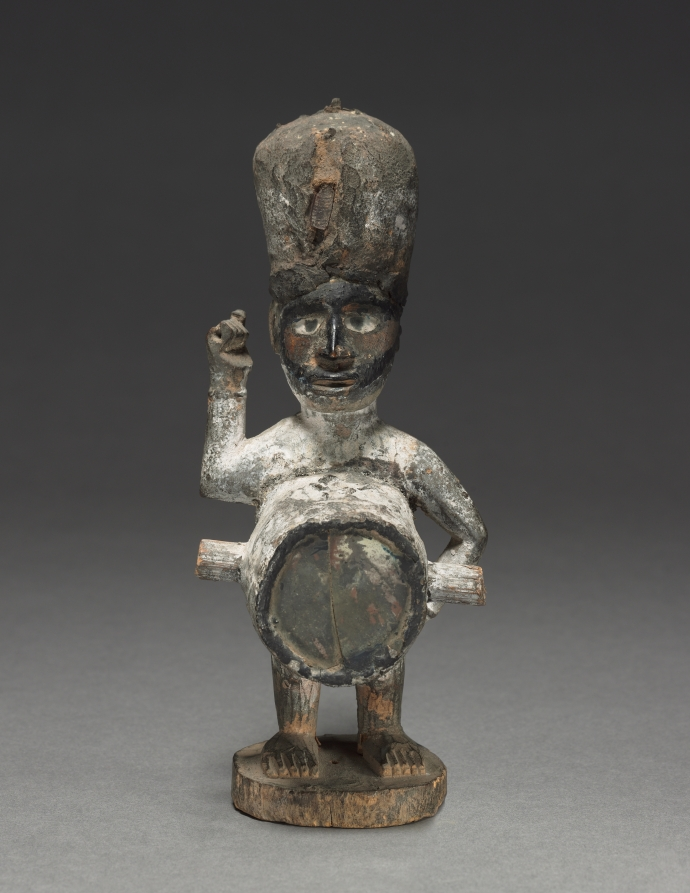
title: Power figure (nkisi)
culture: Central Africa, Republic of the Congo, Kongo people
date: late 1800s-early 1900s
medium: Wood, organic materials (including resin), probably kaolin, and metalized glass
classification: Sculpture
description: This figure is of the nduda type, characterized by the attached "guns" loaded with gunpowder and used to shoot witches. It is the only figure that adopts the threatening pose: the right hand raised, holding a spear or knife, and the left hand resting on the hip. Two guns protrude horizontally on both sides of the cylindrical medicine pack on the belly, covered with a round piece of mirror.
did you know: This is the only figure in a group of seven found in a French antique shop adopting a threatening pose.